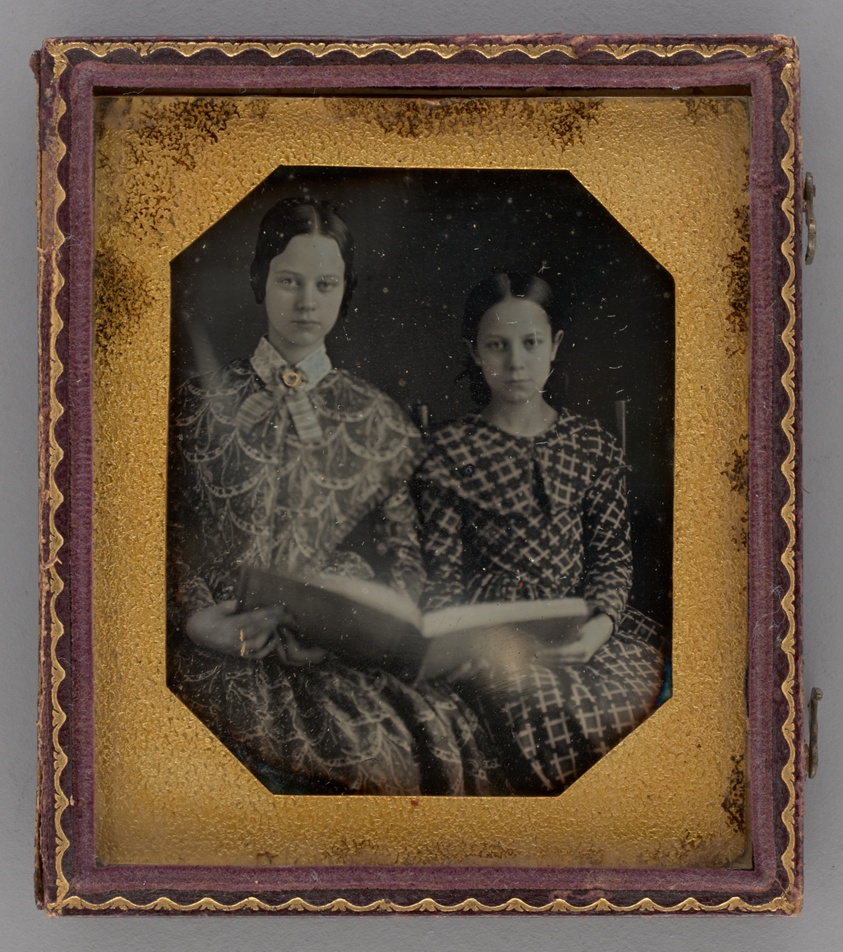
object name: Photograph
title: Untitled (Portrait of Seated Two Girls Holding a Book)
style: 19th century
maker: Unknown maker; American, 19th century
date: 1848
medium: Daguerreotype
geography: United States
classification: portrait; photograph; photographic process; photography; portrait; daguerreotype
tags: lundberg collection, portraits, portraits: child subject, portraits: female subject, people, portrait, reading, girls